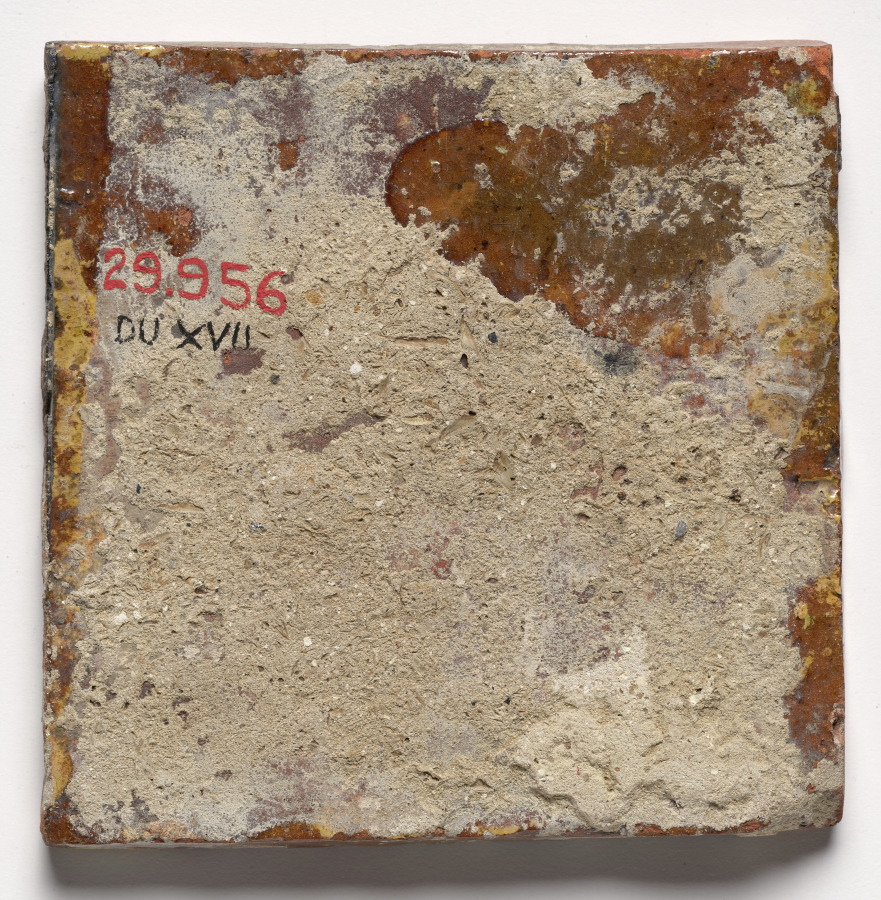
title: Tile- Diamond Medallion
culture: Netherlands, Holland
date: c. 1600s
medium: glazed ceramic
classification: Ceramic